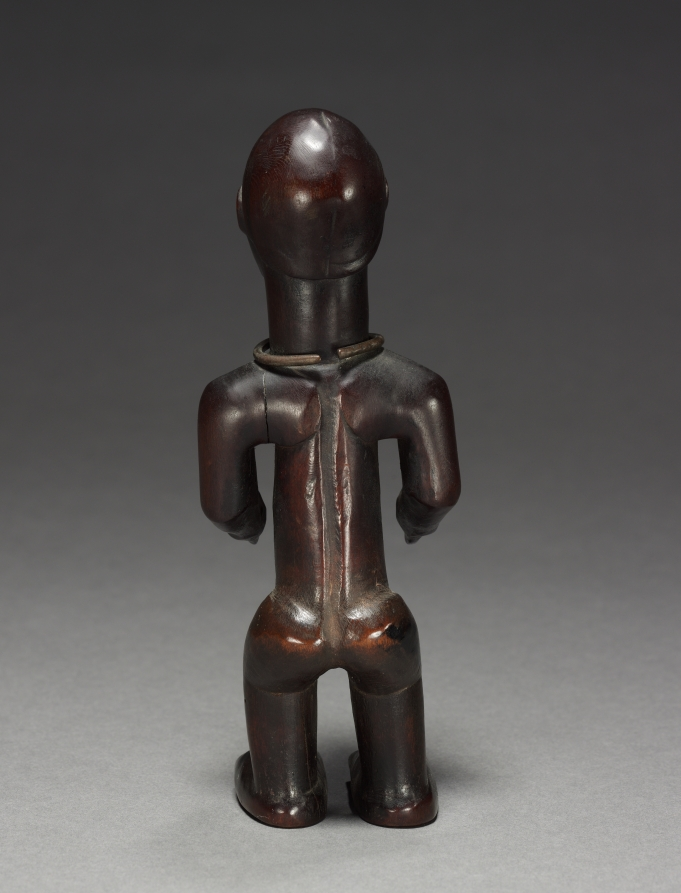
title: Female Figurine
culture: Africa, Central Africa, Republic of the Congo, Beembe-style maker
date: late 1800s-early 1900s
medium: Wood, possibly ceramic, and copper alloy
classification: Sculpture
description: Beembe figurines generally have greatly detailed anatomical and decorative features. The scarification among Beembe men and women communicated their ideas about local beauty and ethnic belonging. These figures are charged with an ancestor’s spirit through a mixture of resin and human-derived ingredients—taken from the corpse of the person they possibly portray—into a small cavity near the rectum.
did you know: The carvings in the figure’s abdomen reflect the custom of body scarification among the Beembe people.